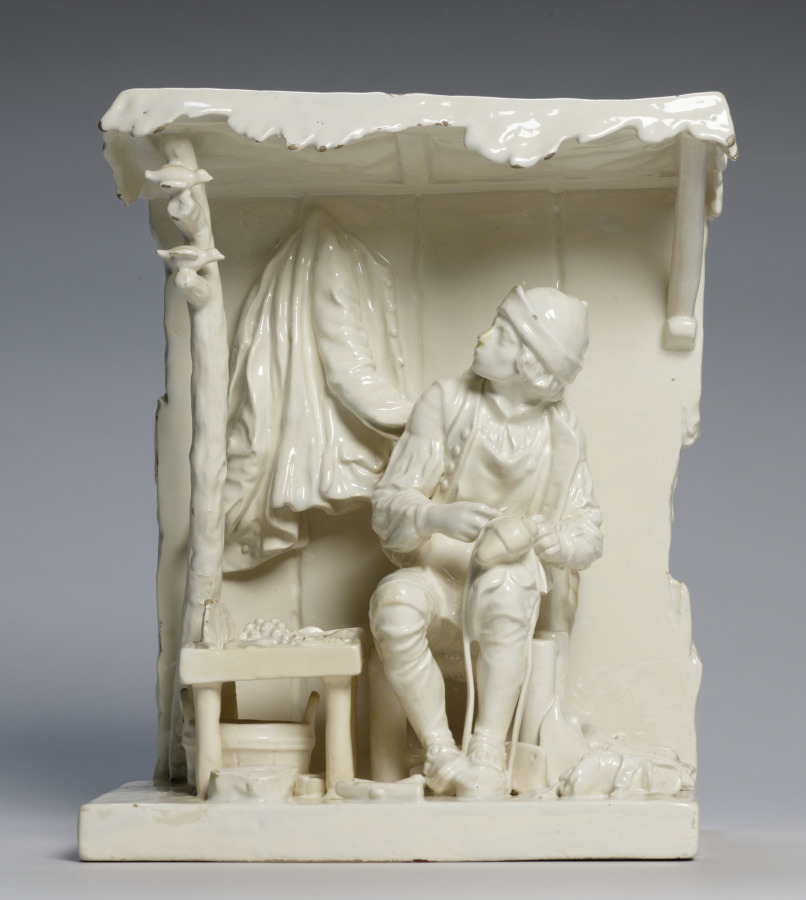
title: The Cobbler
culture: Italy or France, 19th century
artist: after a design by Paul-Louis Cyfflé (Flemish, 1724–1806)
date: 1800s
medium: earthenware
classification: Ceramic